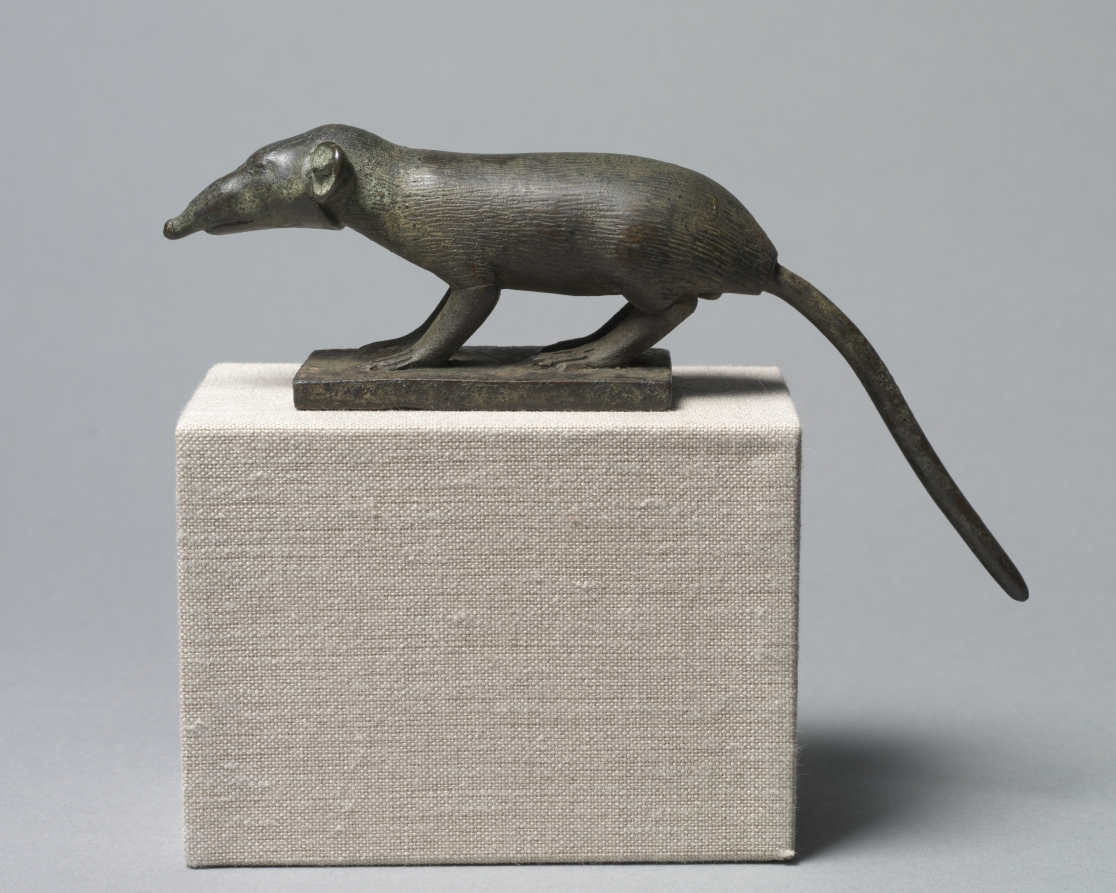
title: Shrew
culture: Egypt, Greco-Roman period (332 BCE–395 CE), Ptolemaic dynasty (305–30 BCE)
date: 305–30 BCE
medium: bronze, solid cast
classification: Sculpture